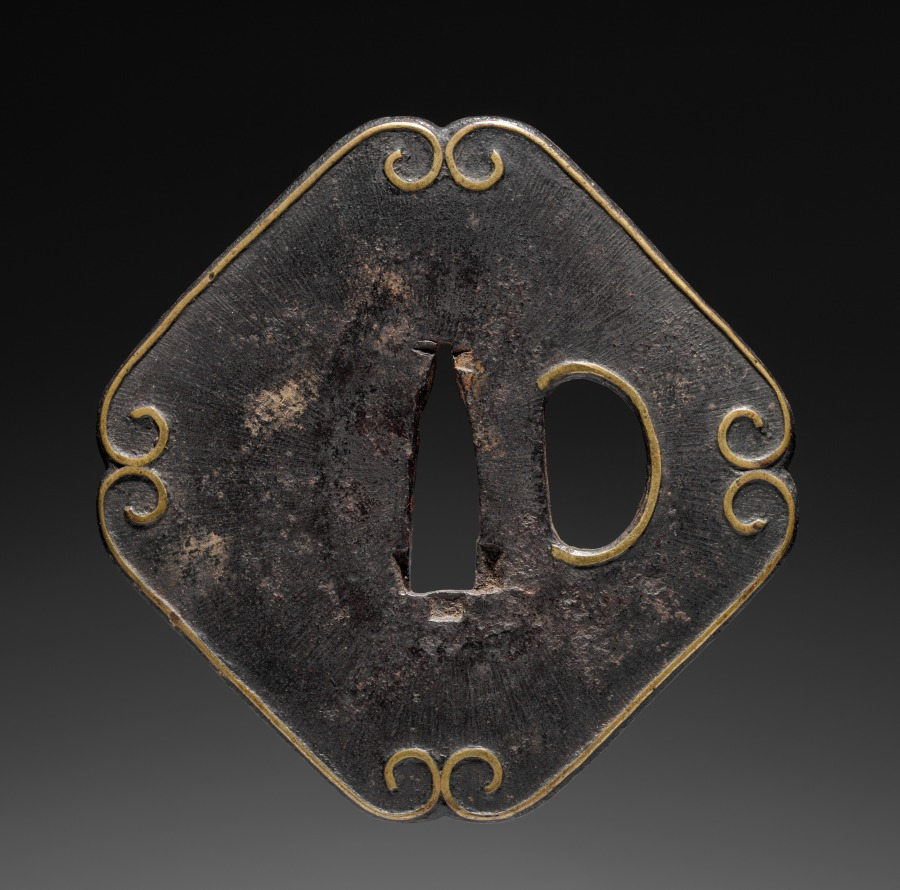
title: Sword Guard (Tsuba)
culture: Japan, possibly Edo period (1615-1868)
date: c. 1615–1868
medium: iron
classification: Arms and Armor